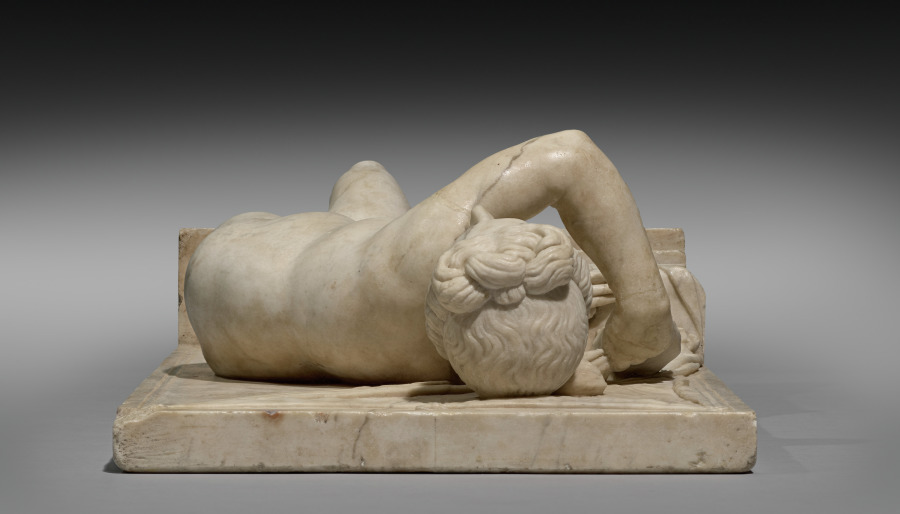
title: Dido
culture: Italy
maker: Aurelio Lombardo (Italian, 1501–1563)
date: c. 1525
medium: marble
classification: Sculpture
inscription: PVNICA SVM [DIDO ERE]XI QVAE MOENIA BYRSA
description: Artists customarily portrayed Dido as a forlorn lover abandoned by the Trojan hero, Aeneas, but here she is a conquering queen. Dido draws aside an oxhide curtain, a reference to the mythical founding of Carthage (in modern-day Tunisia, North Africa), when she was given an oxhide to demarcate granted land. By cutting it into thin strips she was able to encircle the future city. Dido was likely created for display in a studiolo, a place of study featuring refined works of art appreciated by humanist scholars and aficionados during the Renaissance.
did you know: Dido’s nudity and hairstyle are allusions to ancient Greek images of Aphrodite.